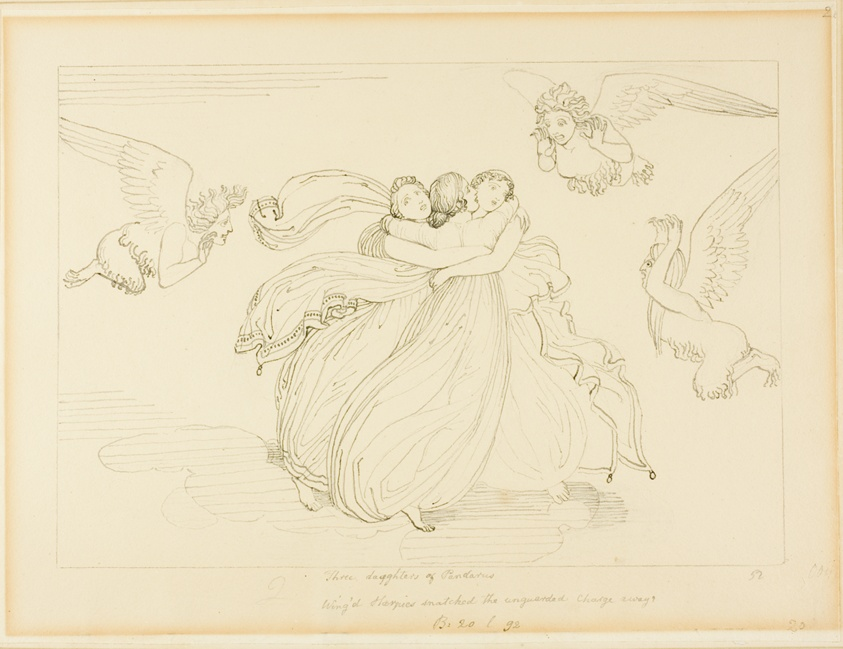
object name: Drawing and Watercolor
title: The Harpies and the Daughters of Pandarus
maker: John Flaxman, II; English, 1755-1826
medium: Pen and black ink, over graphite, on tan wove paper, laid down on tan wove paper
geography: England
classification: pen and ink drawings; drawings (visual works); prints and drawing